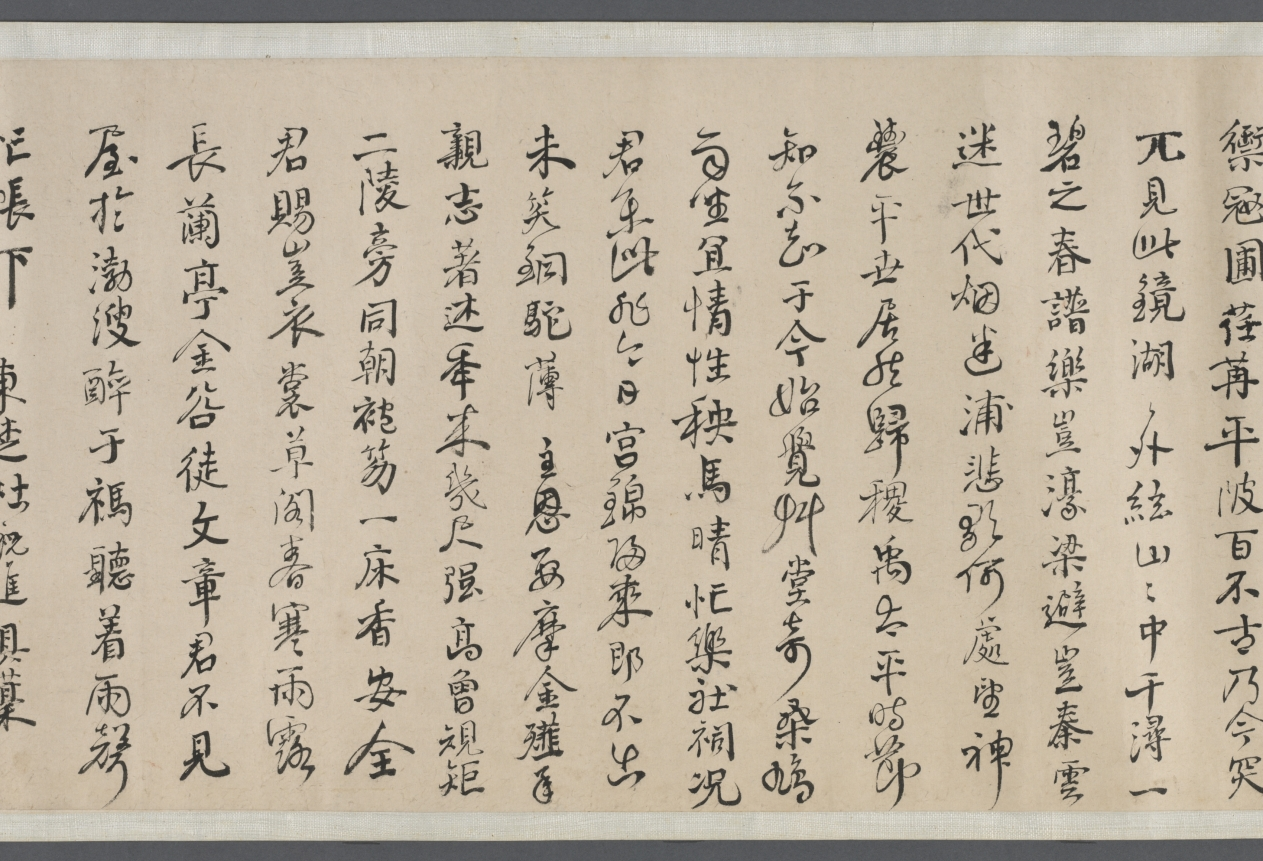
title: Spring Rain Thatched Hut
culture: China, Qing dynasty (1644-1911)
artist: Wang Jianzhang (Chinese, active 1621–1662)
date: 1650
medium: handscroll, ink on paper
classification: Drawing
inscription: Title by Wu Zhiying 吳芝瑛 (1868–1933), dated 1910.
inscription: 春雨草堂圖。庚寅仲春，為紫玄社兄畫於若耶溪上。 仲初王建章。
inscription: 12 colophons by Gong Weiliu’s 宮偉鏐 (1611–1680) contemporaries: Fang Gongqian 方拱乾 (1596–1667, jinshi of 1628); Jiang Cai 姜埰 (1607–1673); Liang Yizhang 梁以樟 (1608–1665); Du Shaokai 杜紹凱 (also named Du Jie 杜岕, 1617–after 1689), dated 1648; Zhao Kaixin 趙開心 (d. 1663), dated 1647; Zhao Erbian 趙而忭 (d. 1658); Yu Yaoguang 余耀光, dated 1649; Yao Quan 姚佺, dated 1648; Chen Taisun 陳台孫 (b. 1611, jinshi of 1640); (Monk) Shao 韶; Du Zhujin 杜祝進; and Tang Shi 唐時.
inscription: 此研田莊居士王建章為先太史紫元公所作春雨草堂圖也。居士字仲初，明崇禎間人，與先太史及惲香山相友善。喜畫佛像，自謂不讓李公麟。山水祖述董源，筆力雄健，有不可羈勒之概。香山稱其墨有五采，非世人所知。然性廉重，非同志不輕落筆，人得其寸圖尺縑，必相與忻賞，如獲蜼彝兕敦，非人世間物也！見先太史筆記，此圖寫雨景，而氣韻生動，勃勃於不能止。每一展覽，覺滿紙雲烟，墨瀋猶濕，如寫吾先人胸中未盡之邱壑也。圖後題詠，多一時名手，想見文采風流之盛。迄今二百餘年，舊德先疇，遺風未沫。吾子孫其永寶之，如與吾先人接謦咳於一堂，為感思之助，其敢作圖畫觀乎！同時香山亦有圖佚去己久，不知異日能為延津之合否。壬申長夏本昂重裝敬識。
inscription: Collectors' seals including: Gong Ben'ang 宮本昂 (1821–1874); Lian Qian 廉泉 (1868–1932); Wu Zhiying 吳芝瑛 (1868–1933)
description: With its striking simplicity, this painting captures the pure serenity of a private garden in the moist atmosphere of a spring morning on a small river. Painted in the style of Ni Zan, Wang Jianzhang dedicated this work to his patron-friend Gong Weiliu (1611-1680). Gong retired from government service after the fall of the Ming dynasty and constructed a garden-retreat at his native home in Taizhou, Jiangsu province. He invited scholars and poets from his literary society to contribute writings of his estate, which are here mounted together with the painting in this scroll.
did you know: Gong Weiliu, the owner of the estate portrayed here, had received his prestigious jinshi degree in 1643, but his official career was thwarted by the collapse of the Ming dynasty the following year.